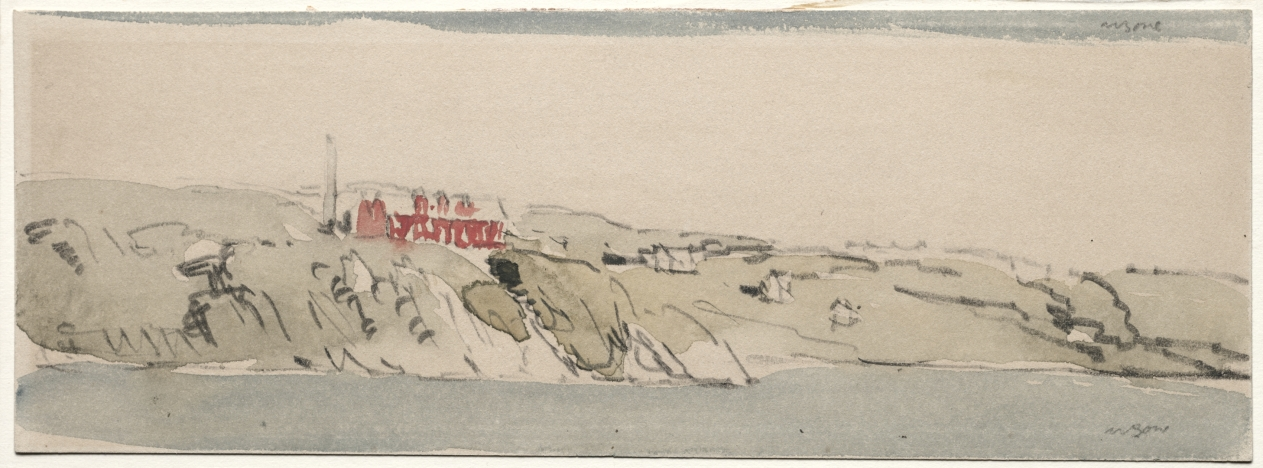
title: Entering Bergen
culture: England, 20th century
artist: Muirhead Bone (British, 1876–1953)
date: c. 1896–1953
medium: watercolor and graphite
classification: Drawing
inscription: Lower right and upper right, in graphite: M. Bone